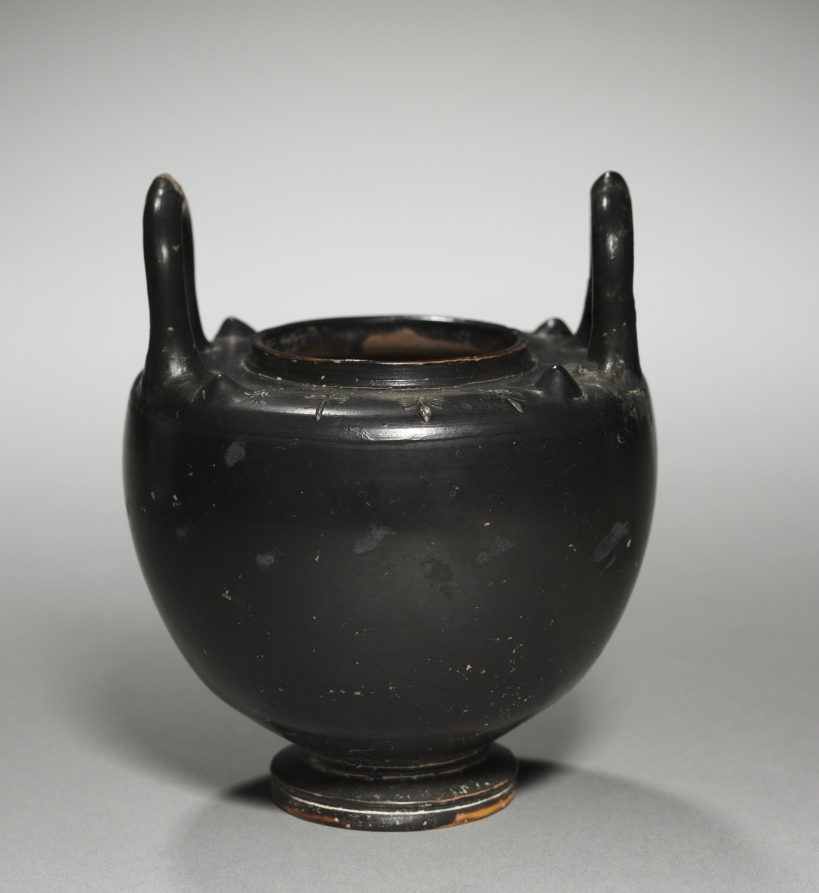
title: Black-Gloss Lebes Gamikos (Nuptial Bowl)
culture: Greek or South Italian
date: c. 425–375 BCE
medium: ceramic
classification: Ceramic